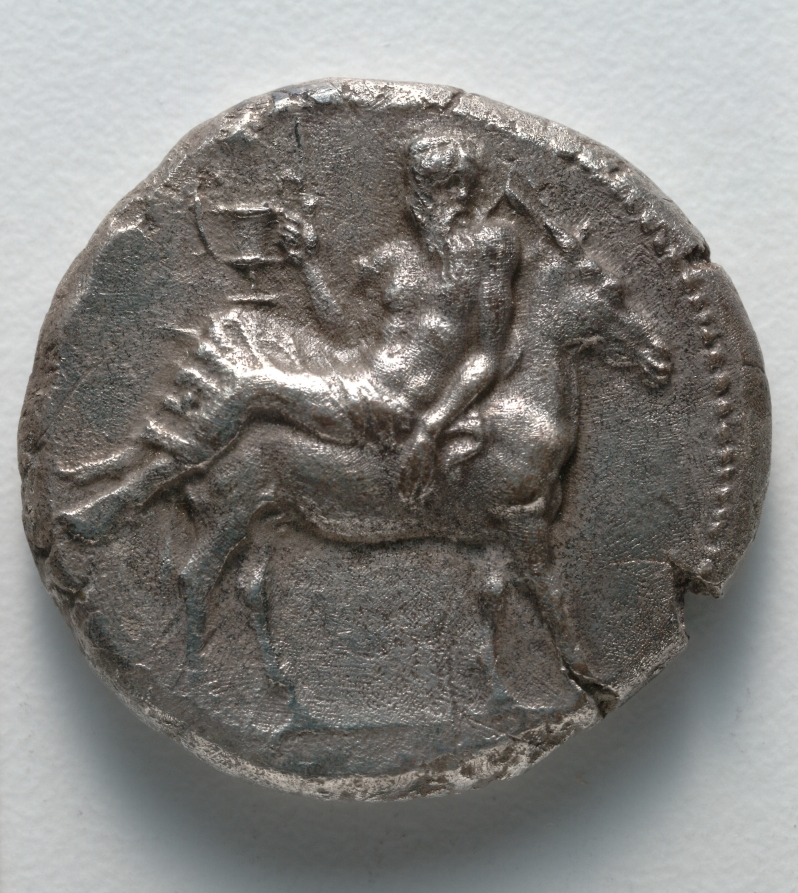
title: Tetradrachm: Dionysos with Kantharos on Donkey (obverse)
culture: Greek, minted at Mende (Chalkidiki)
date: c. 430 BCE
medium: silver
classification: Coins